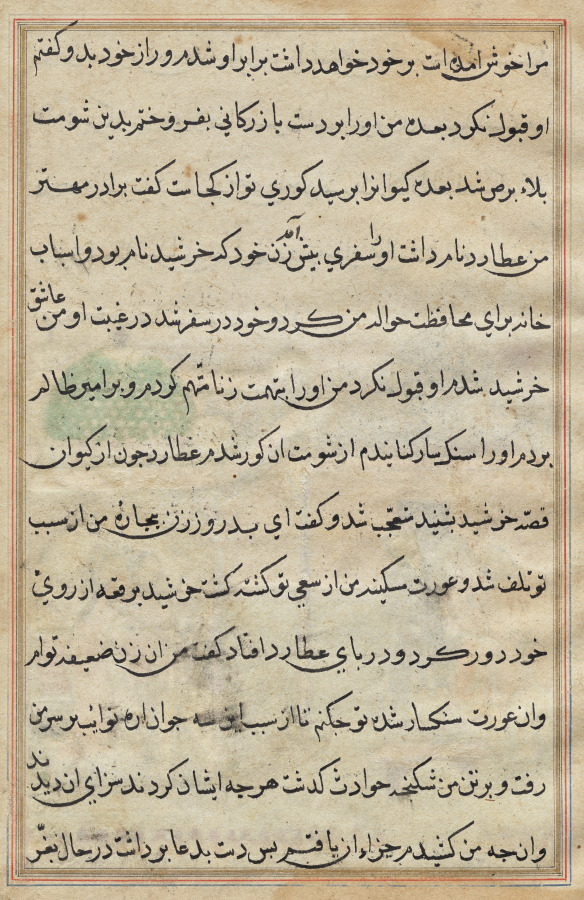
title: Page from Tales of a Parrot (Tuti-nama): text page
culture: Mughal India, court of Akbar (reigned 1556–1605)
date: c. 1560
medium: gum tempera, ink, and gold on paper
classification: Painting